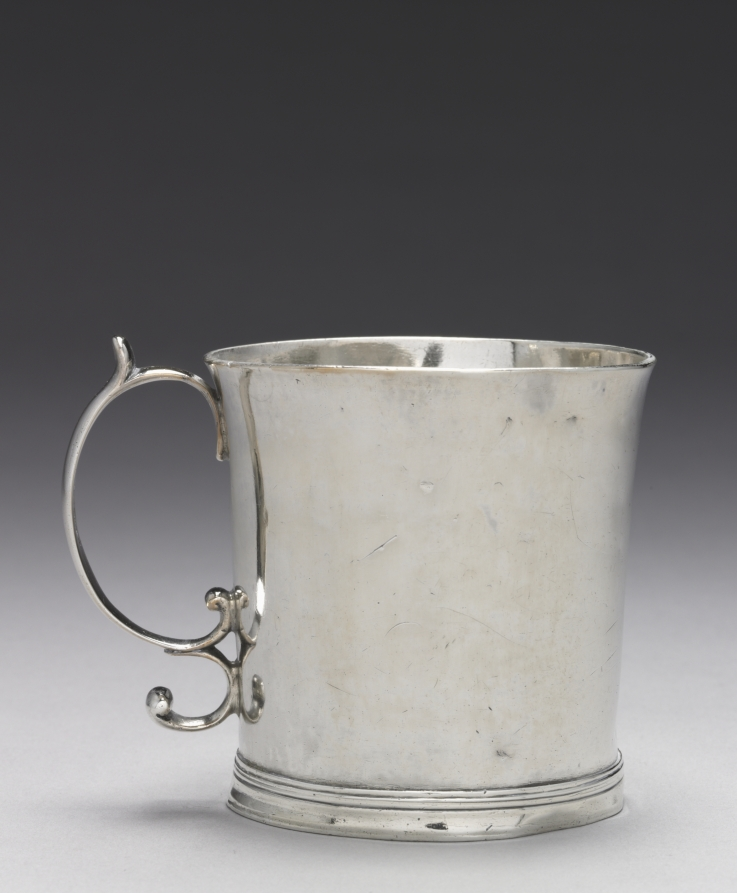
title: Mug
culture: America, Massachusetts, Boston, late 17th-early 18th Century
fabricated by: John Coney (American, 1656–1722)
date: 1680–1710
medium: silver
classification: Silver